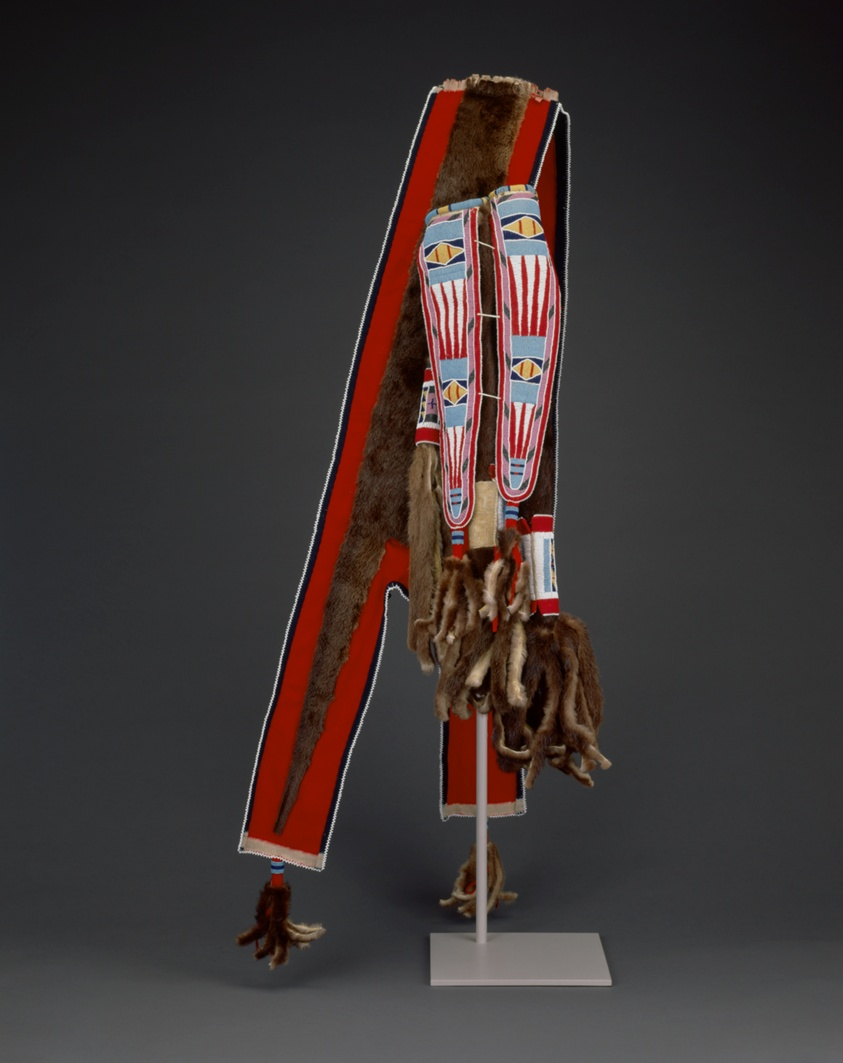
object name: Costume and Accessories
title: Quiver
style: crow, plains indian, native american, americas, native north american, Arts of the Americas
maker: Artist unknown (After Crow, Apsáalooke style); Northern Plains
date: 19th–20th century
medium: Wool, otter skin, and glass beads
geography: Northern Plains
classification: leather/animal skin; art of the americas; weapon; costume